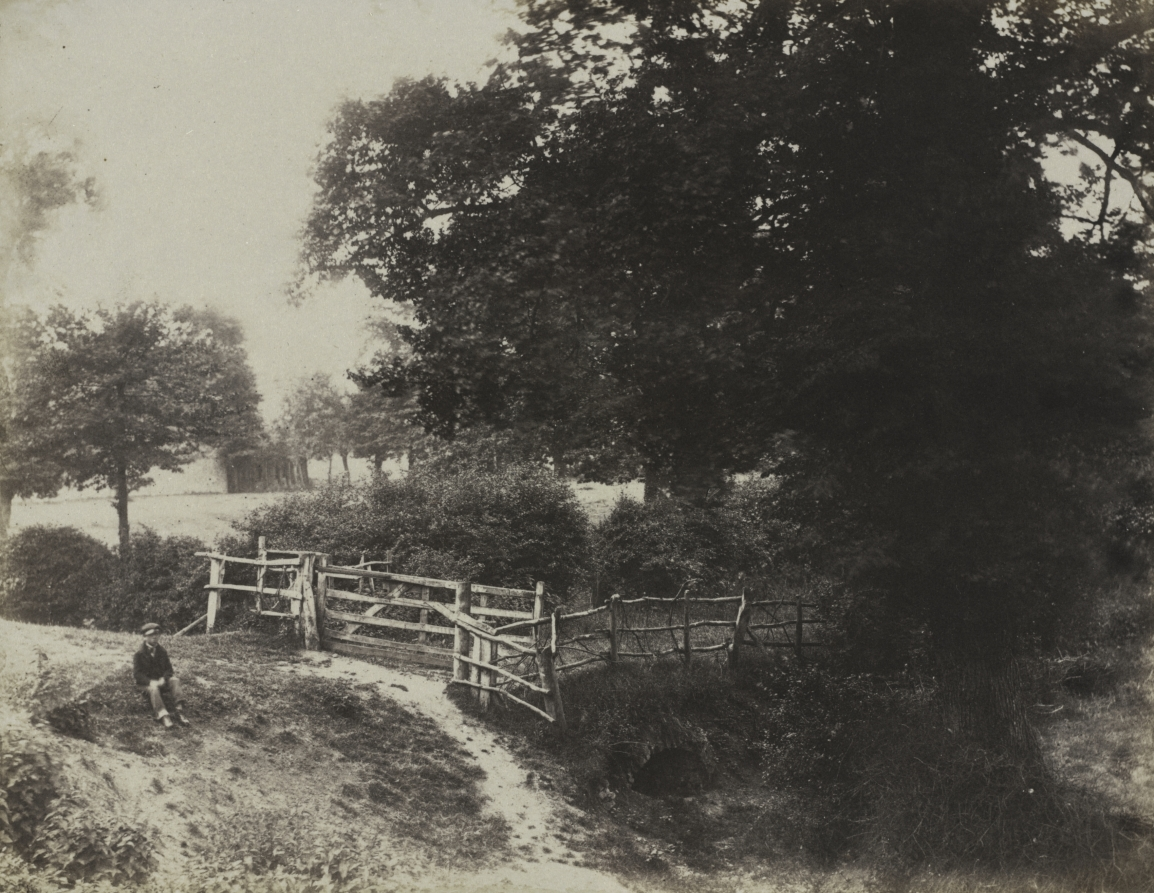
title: Green Meadows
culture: England, 19th century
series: The Photographic Album for the Year 1855, pl. 31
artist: George Shadbolt (British, 1819–1901)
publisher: Photographic Exchange Club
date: 1854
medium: salted paper print from calotype negative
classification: Photograph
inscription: Written in pencil on verso: "2)"; "SHADBOLT"